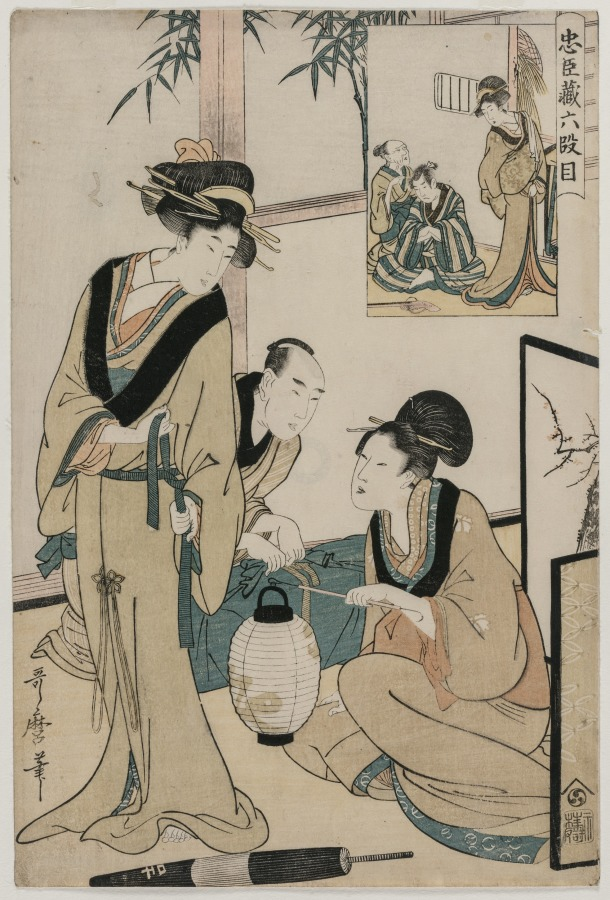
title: Chushingura: Act VI of The Storehouse of Loyalty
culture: Japan, Edo period (1615–1868)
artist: Kitagawa Utamaro (Japanese, c. 1754–1806)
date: late 1790s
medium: color woodblock print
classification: Print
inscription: Signature: Utamaro hitsu Publisher: Nishimuraya Yohachi (Eiju han, emblem)